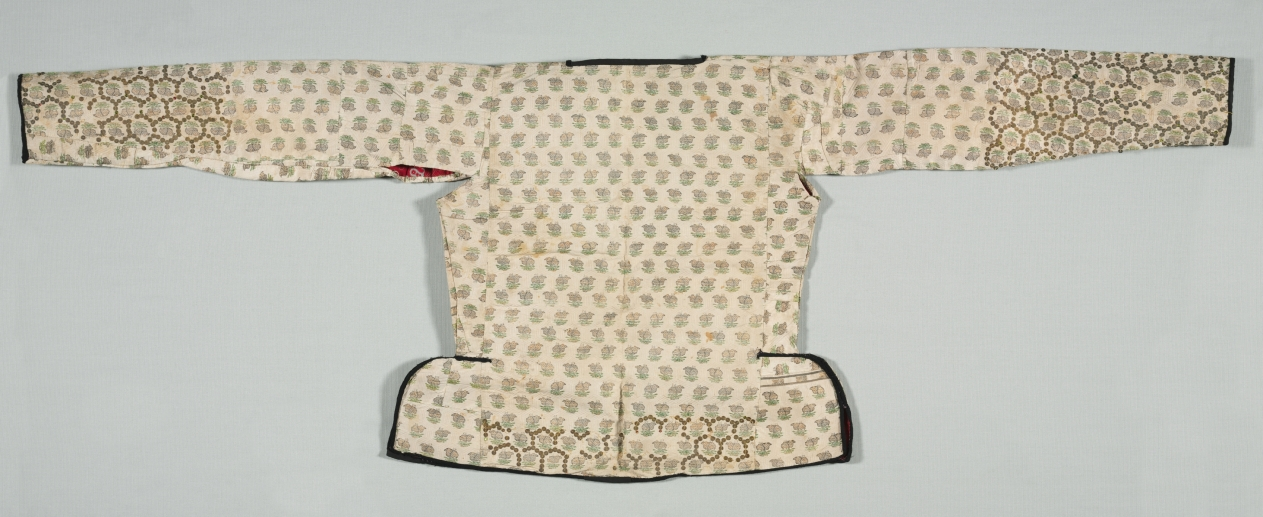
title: Jacket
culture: Iran, 18th century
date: 1700s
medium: Silk taffeta, brocaded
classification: Garment